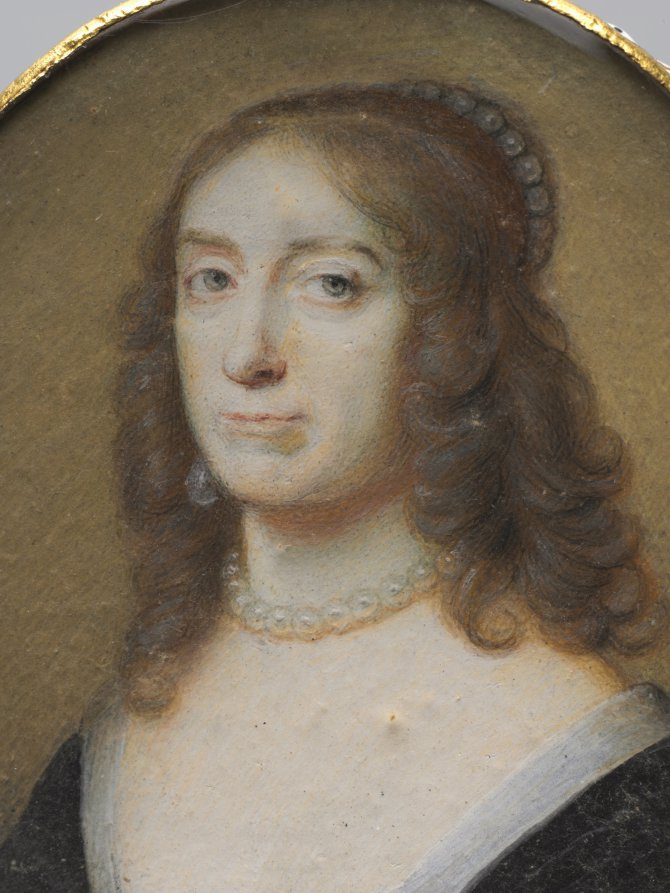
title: Portrait of Elizabeth Stuart, Electress Palatine and Queen of Bohemia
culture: England, 17th century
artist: Alexander Cooper (British, 1609-c. 1658)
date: 1630s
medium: watercolor on vellum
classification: Portrait Miniature